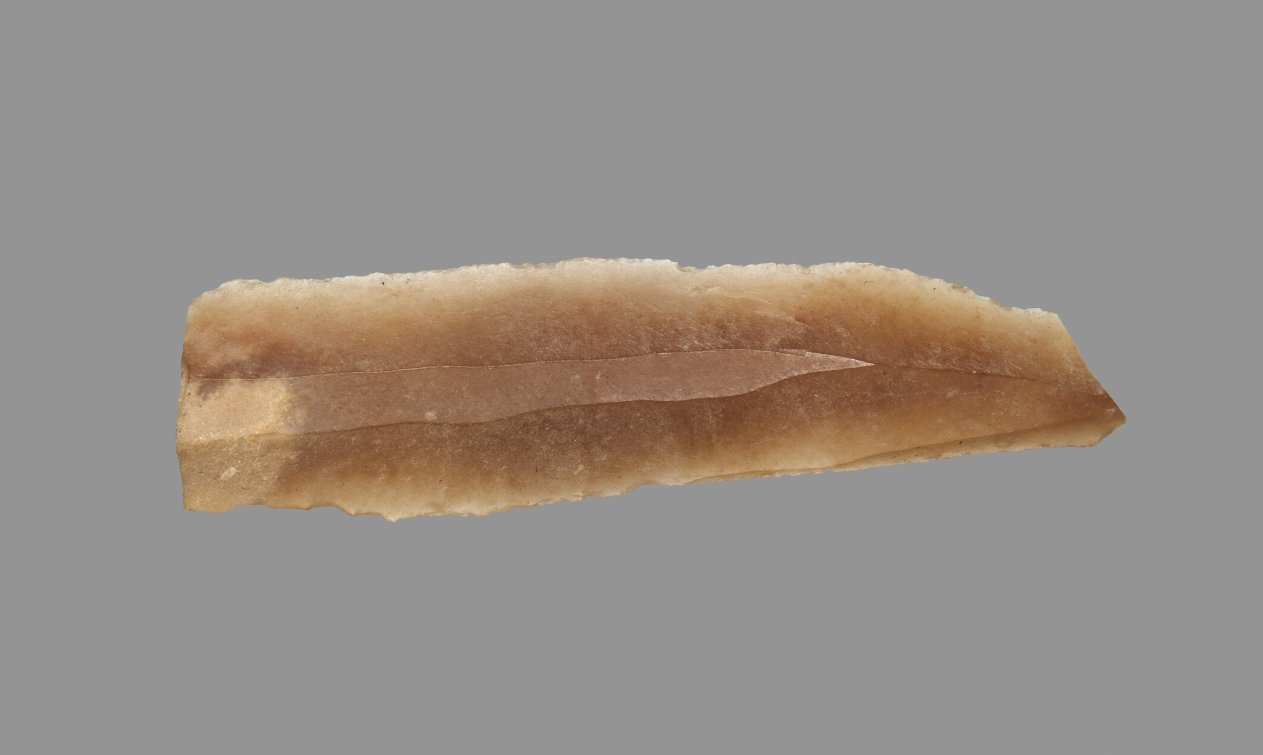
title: Sickle Blade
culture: Egypt, Middle Kingdom (2040–1648 BCE), Dynasty 12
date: 1980–1801 BCE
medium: flint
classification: Implements